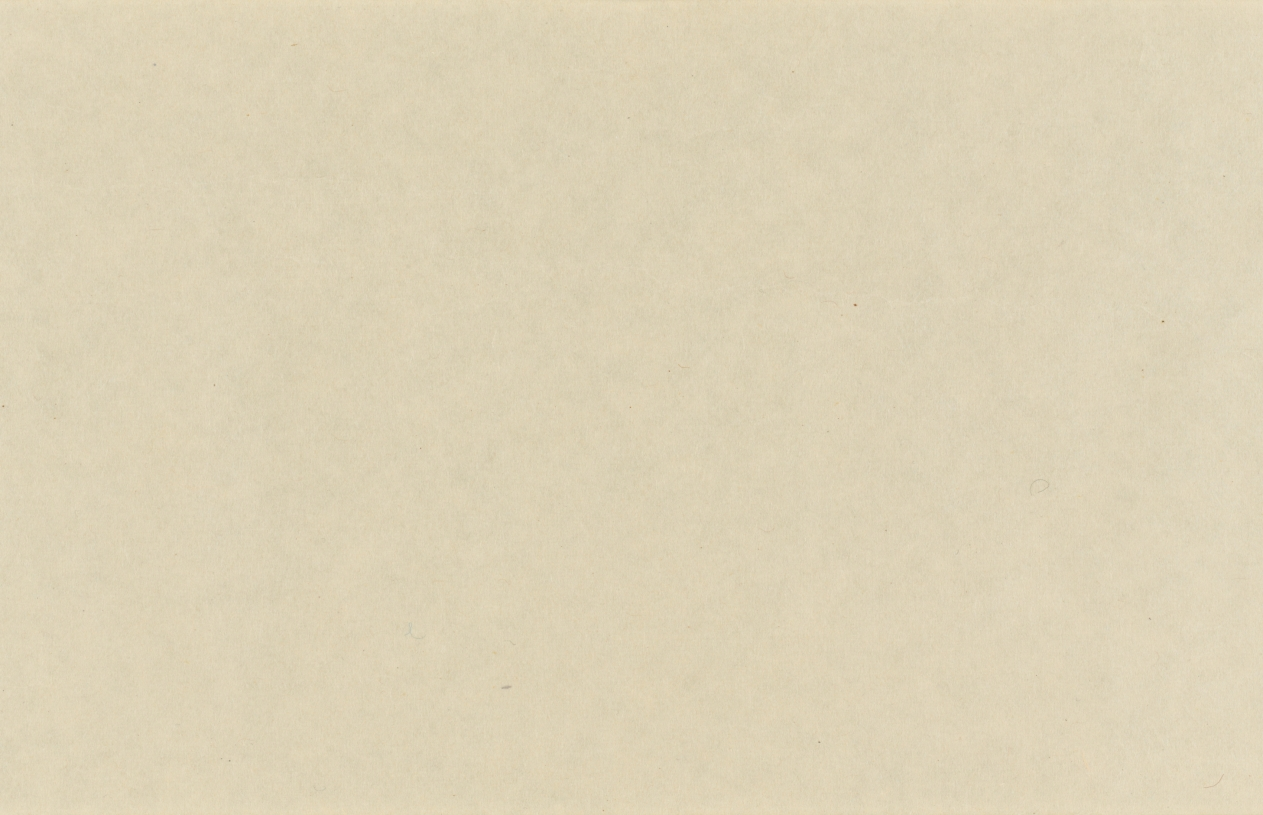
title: Eight Views of Xiao-Xiang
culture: Japan, Muromachi period (1392–1573)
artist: Sesson Shūkei (Japanese, c. 1492–c. 1577)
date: 1500s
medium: handscroll; ink on paper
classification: Painting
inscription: Signature and seal of artist at end of painting.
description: Eight Views of the Xiao and Xiang Rivers can be traced to 11th-century Chinese poems and paintings, the depiction of which had also become popular among Korean and Japanese painters. Xiao-Xiang refers to the region in present-day Hunan province where the Xiao and Xiang rivers converge. Few painters of the Eight Views had in fact seen the scenery; rather, they were trying to portray in ink and wash the lyrical qualities of dim light and a misty atmosphere typical of that region. Each of the poetic titles suggests a time of day, a season, or specific atmospheric conditions—subjects that challenged the abilities of the most talented artists. In this miniature painting (shukuzu) of the Muromachi period, Japanese Zen monk and painter Shukei Sesson depicted all eight views featured in Chinese prototypes: Wild Geese Descending to Sandbar; Returning Sails Off a Distant Coast; Mountain Market in Clearing Mist; River and Sky in Evening Snow; Autumn Moon over Dongting Lake; Night Rain on the Xiao and Xiang; Evening Bell from Mist-Shrouded Temple; and Fishing Village in Evening Glow.